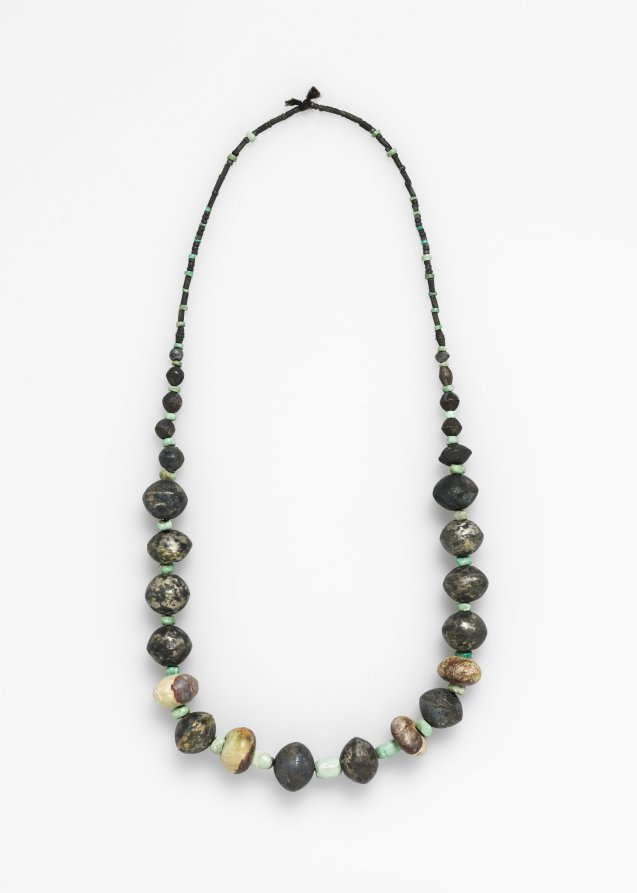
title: Necklace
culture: Peru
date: before 1532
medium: silver and turquoise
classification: Jewelry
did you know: These ancient beads were restrung in modern times.